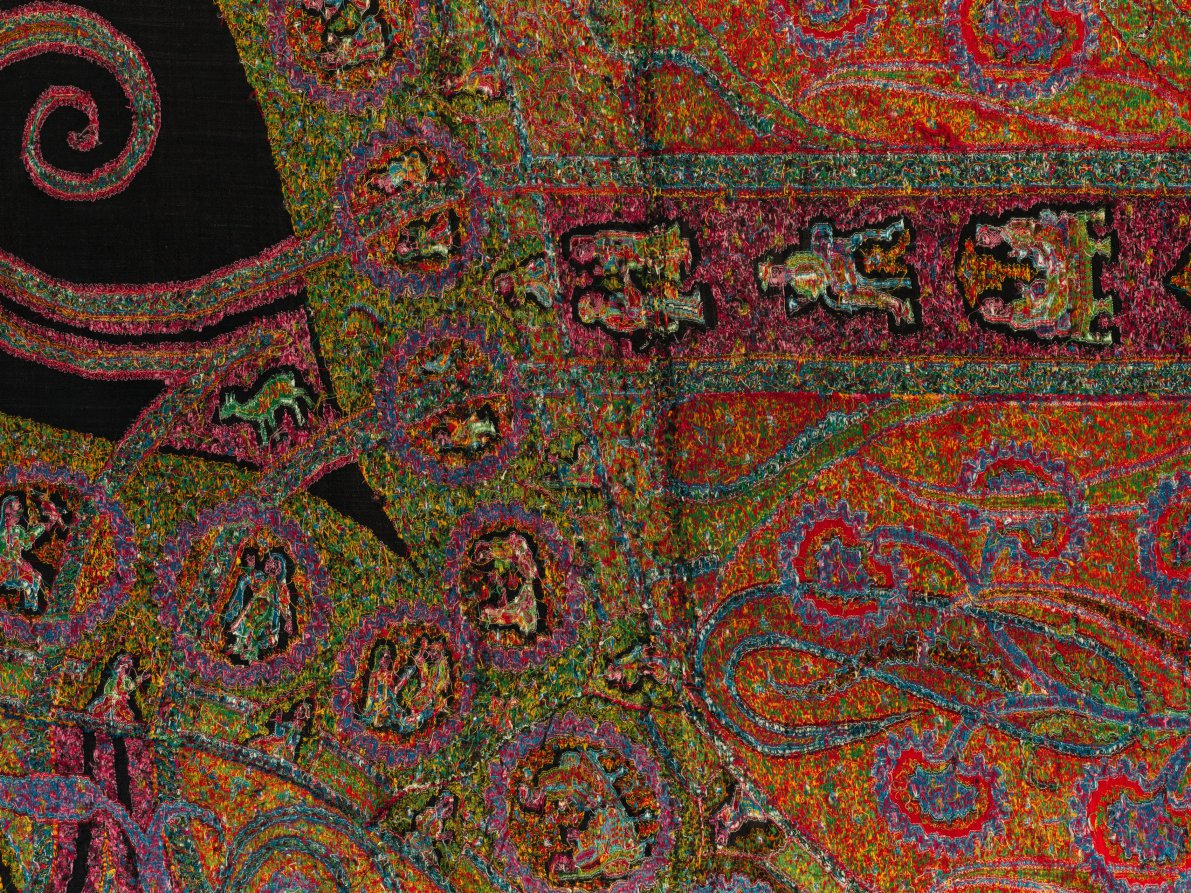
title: Long shawl with woven figures and animals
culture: India, Kashmir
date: c. 1885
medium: 2/2 twill tapestry weave, double interlocked and pieced: wool (possibly pashmina)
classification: Textile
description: Kashmir shawls from India were status symbols in Europe during the 1800s, and few are as rare as this woven example. Over 200 human figures take part in drinking, smoking, dancing, and falconry in the Indian princely scenes that enliven the shawl’s borders and four dark stripes. The stripes alternate with large elongated boteh, or paisley, motifs that intertwine with blossoming stems in a European style adapted by Kashmiri textile artists. This extraordinary woven shawl was probably made to dazzle the jury at one of the European expositions of industrial products, as almost all other figural shawls were embroidered. It was woven in many pieces and then skillfully joined with colorful harlequin end borders.